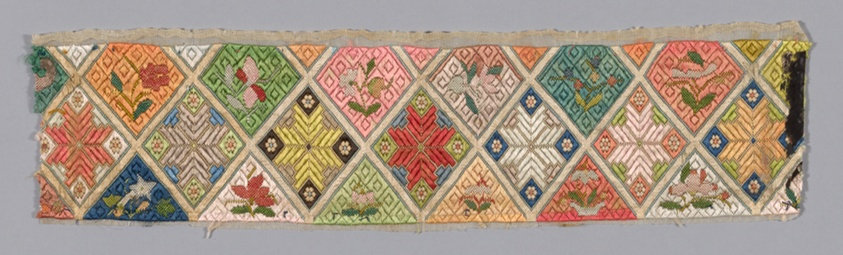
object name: Costume and Accessories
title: Band (from Woman's Trousers or Robe)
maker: China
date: 1875/1900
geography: China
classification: textile; needlework (visual works); costume - needlework; costume